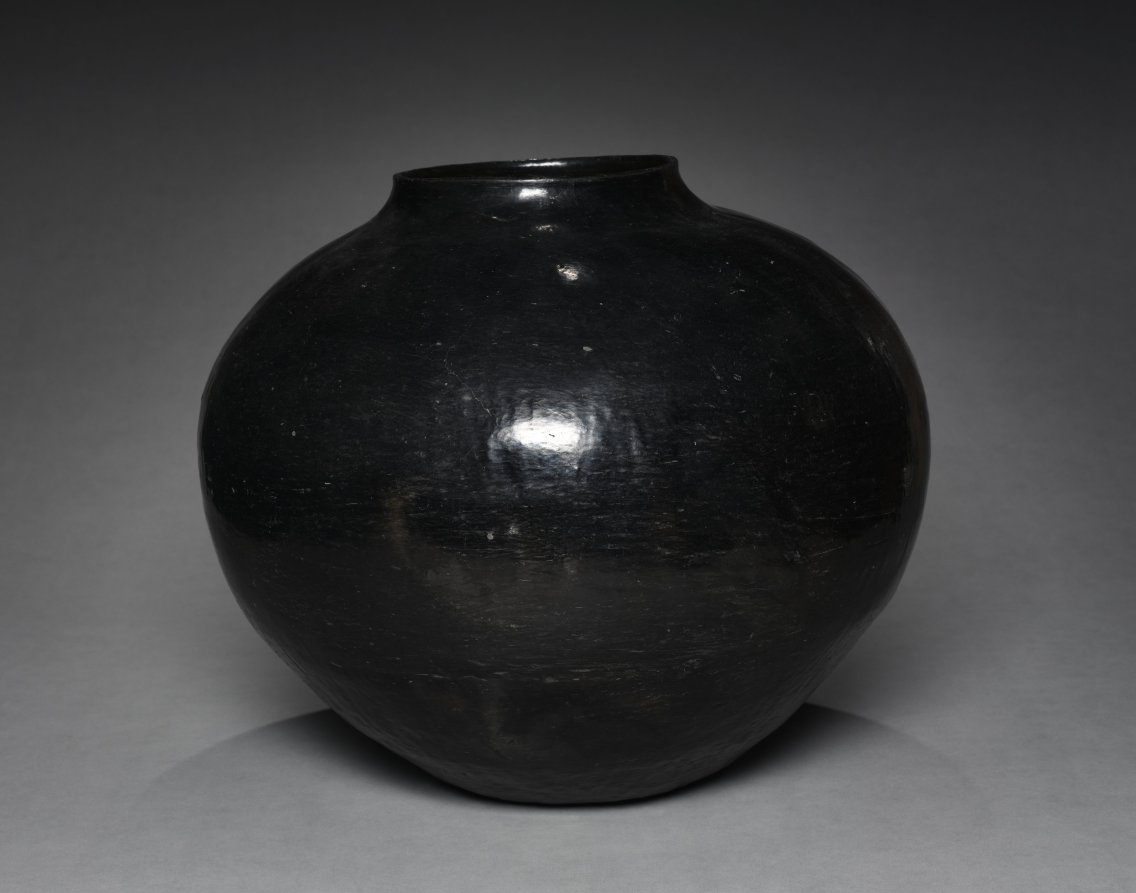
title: Storage Jar, Half- Fanega Size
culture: Southwest, Pueblo, Santa Clara, Post- Contact Period, 19th century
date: 1880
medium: reduction-fired (blackware)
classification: Ceramic